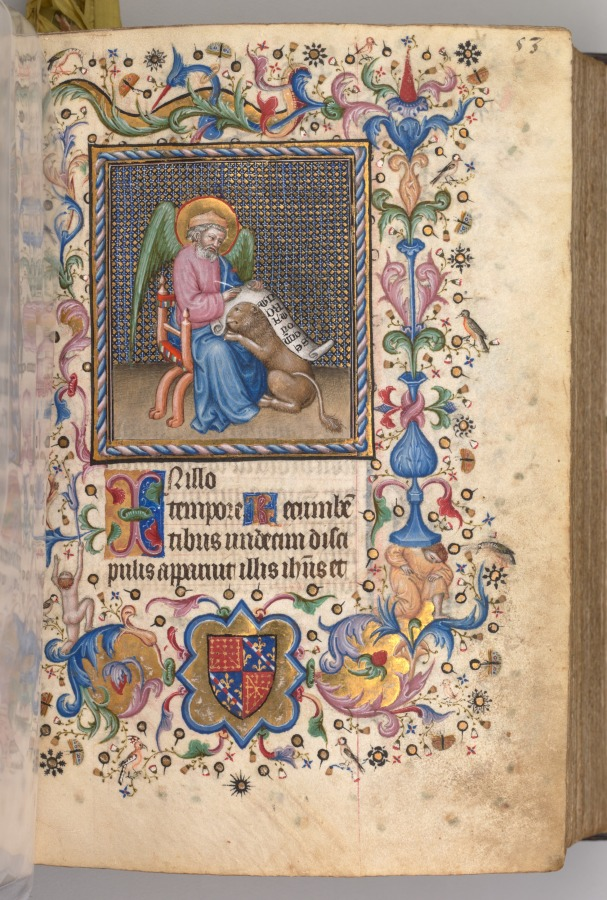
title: Hours of Charles the Noble, King of Navarre (1361-1425): fol. 27r, St. Mark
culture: France, Paris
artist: Master of the Brussels Initials and Associates (French)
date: c. 1405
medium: ink, tempera, and gold on vellum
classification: Bound Volume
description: This precious volume was obviously highly prized by its owner, the French-born King of Navarre, who had his coat of arms painted on no less than twenty folios. Rather than directly commissioning this manuscript from a specific workshop, it seems that Charles the Noble acquired his book of hours -- perhaps ready-made for the luxury market -- while on a trip to Paris in 1404-05. A collaborative effort, six painting styles are evidenced within the pages of this codex, those of two Italians, two Frenchmen, and two Netherlanders. The painter who was responsible for the planning and decoration of the book, and who produced seventeen of the large miniatures, was a Bolognese artist known as the Master of the Brussels Initials. His principal assistant, responsible for most of the borders, was a Florentine who signed his name "Zecho" da Firenze on folio 208 verso.